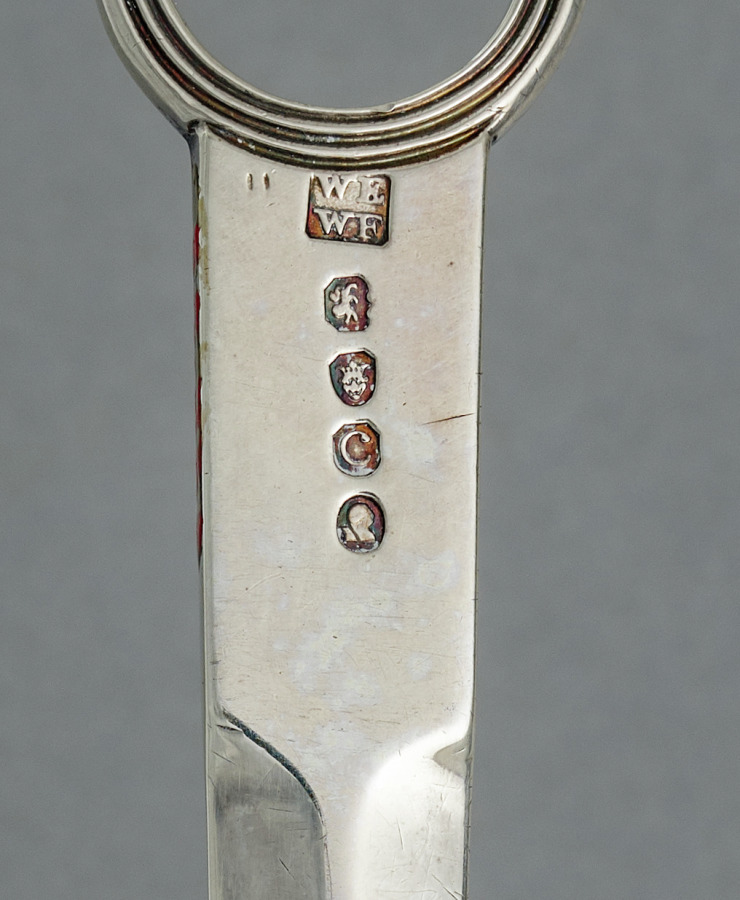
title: Skewer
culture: England, 19th century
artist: firm of William Eley (British)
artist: firm of William Fearn (British)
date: 1818–1819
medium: silver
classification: Silver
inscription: engraved crest on one side.